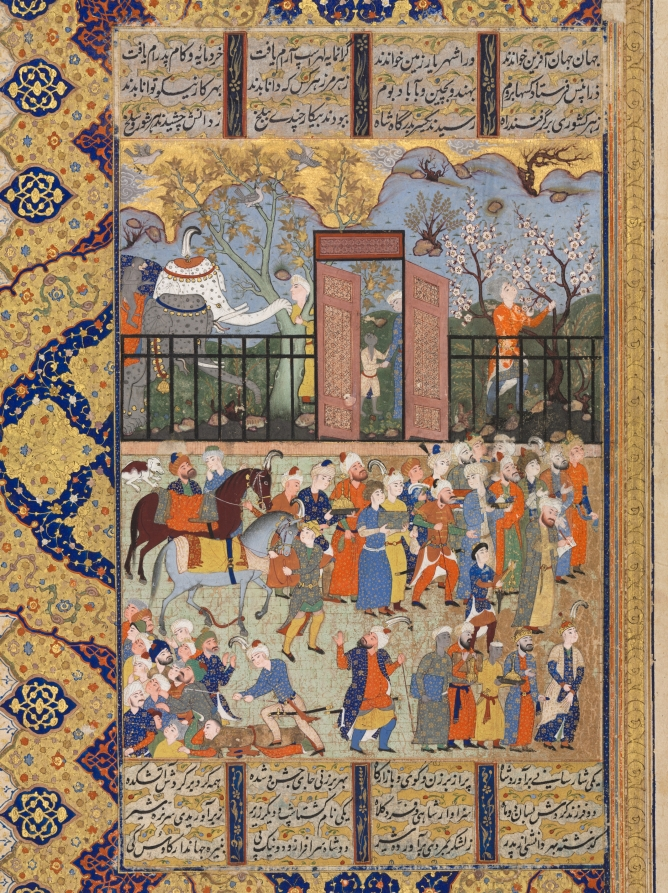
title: King Luhrasp Ascends the Throne: a Processon Arrives at Court, recto of the left folio of a double-page composition from a Shahnama (Book of Kings) of Firdausi (940-1019 or 1025)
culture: Iran, Shiraz, Safavid period (1501-1722)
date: c. 1560–90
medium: opaque watercolor, ink, and gold on paper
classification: Manuscript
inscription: Script: Nasta'liq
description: This scene of a procession arriving at court was surely completed by the court scene itself. The subject of the frontispiece had nothing to do with the text that it accompanied, and the text has not been identified.